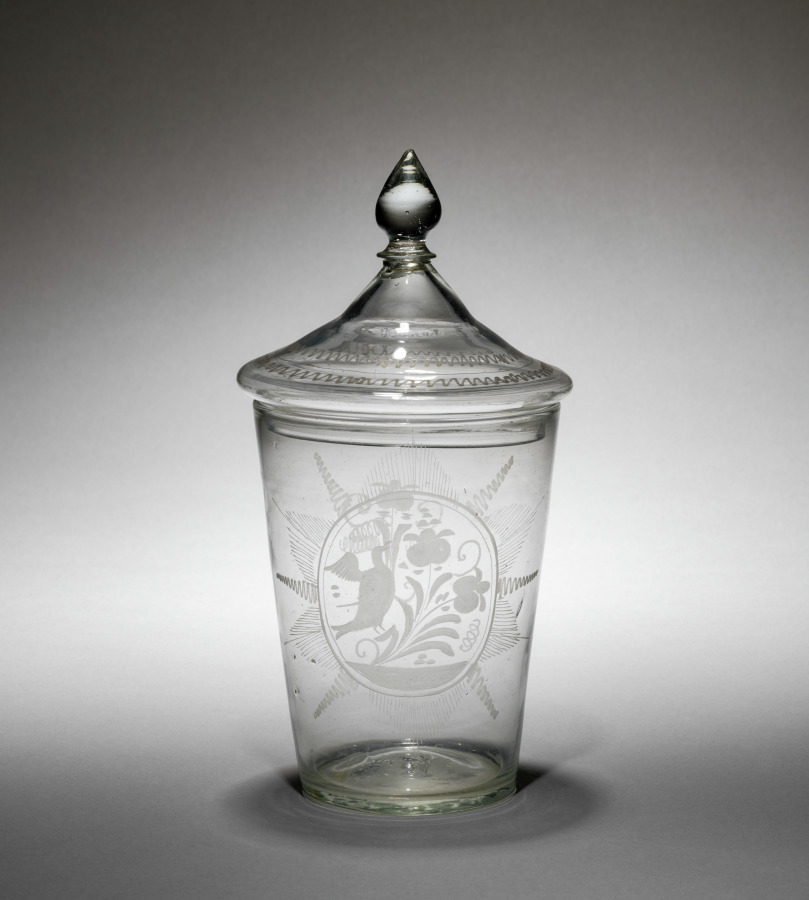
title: Flip Glass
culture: America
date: late 1700s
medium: glass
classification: Glass